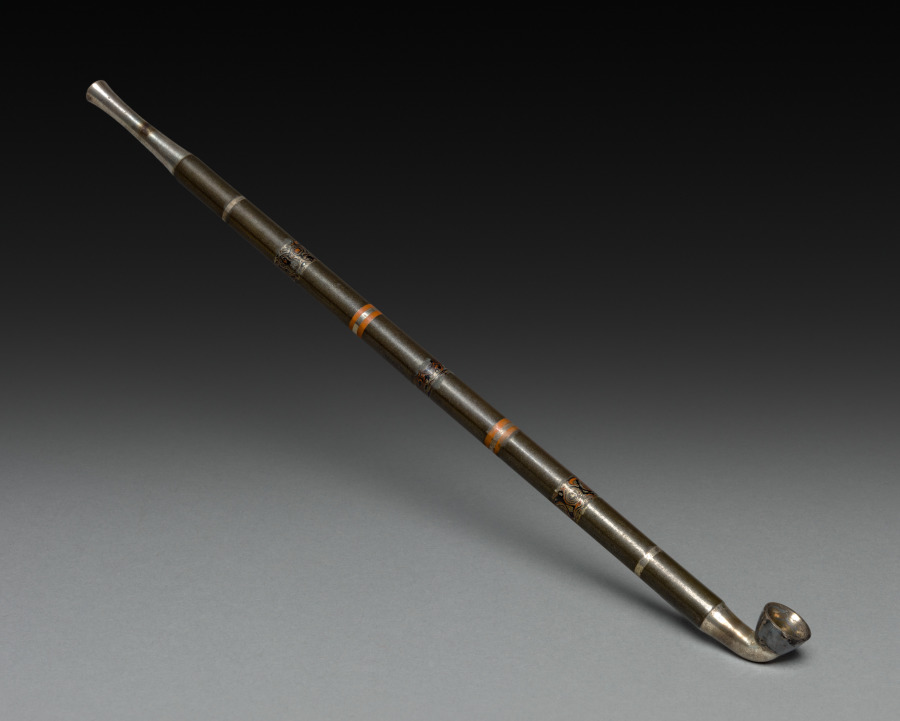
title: Tobacco Pipe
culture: Japan, Edo period (1615–1868)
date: 1700s to mid-1800s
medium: metal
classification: Miscellaneous